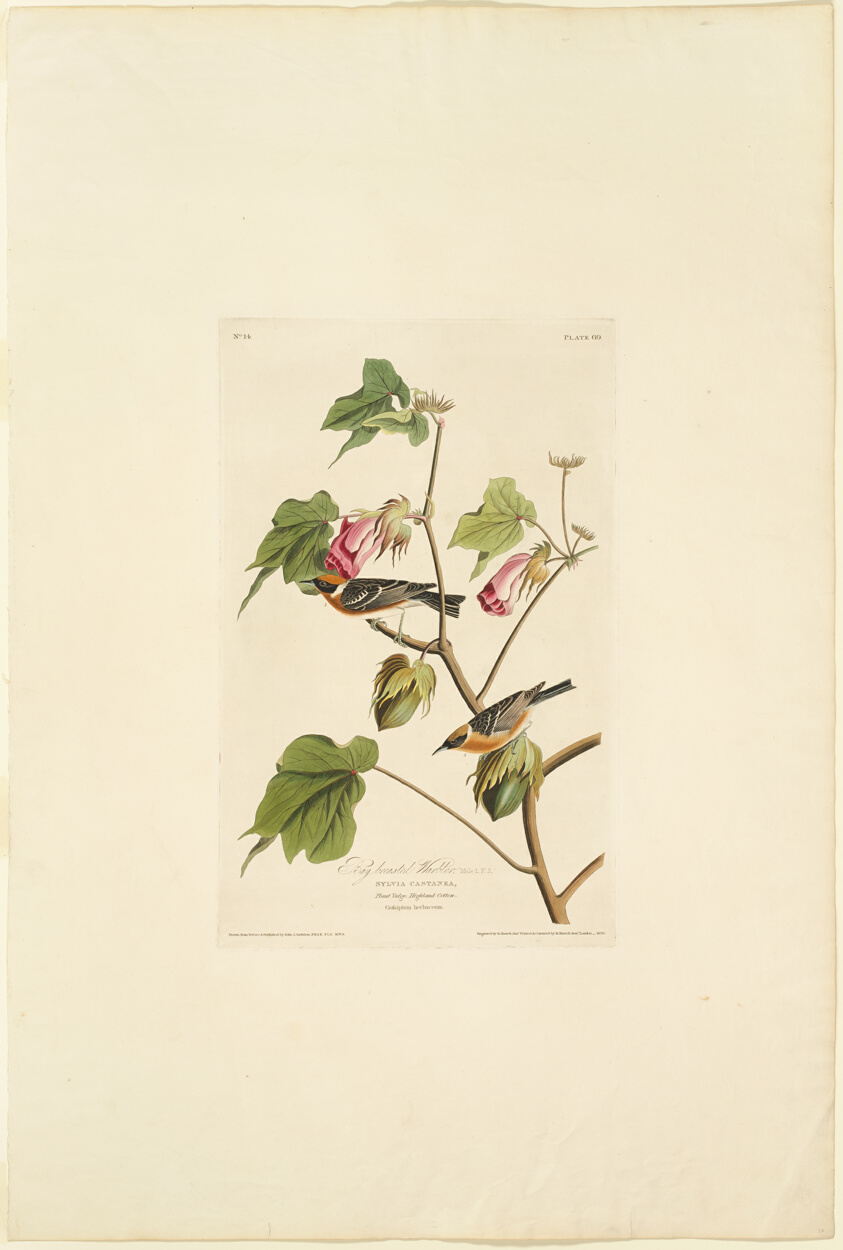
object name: Print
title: Male Bay Breasted Warbler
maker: Robert Havell (English, 1793-1878); after John James Laforest Audubon (American, 1785-1851)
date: 1829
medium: Hand-colored engraving, with aquatint, on cream wove paper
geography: England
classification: etching; print; prints and drawing; paper